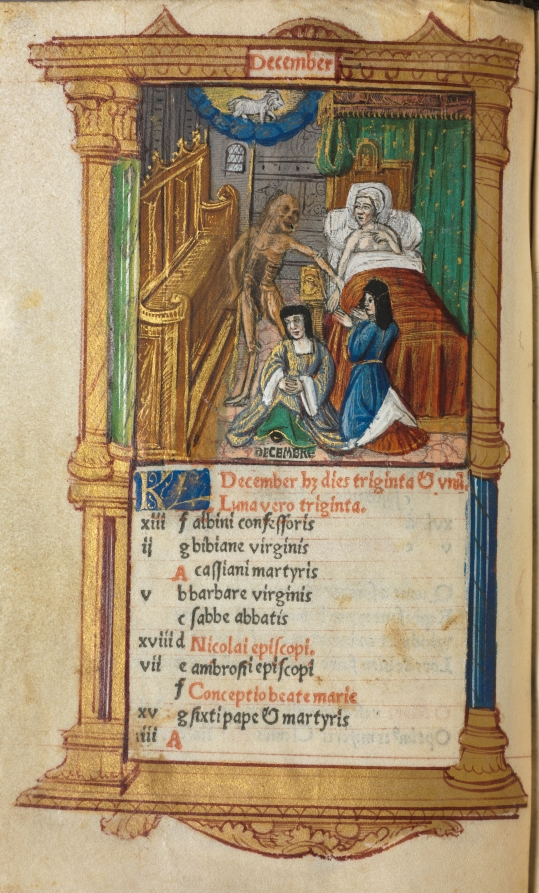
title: Printed Book of Hours (Use of Rome): fol. 13v, December calendar page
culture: France, Paris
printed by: Guillaume Le Rouge (French, Paris, active 1493–1517)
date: 1510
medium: 112 Printed folios on parchment, bound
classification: Bound Volume